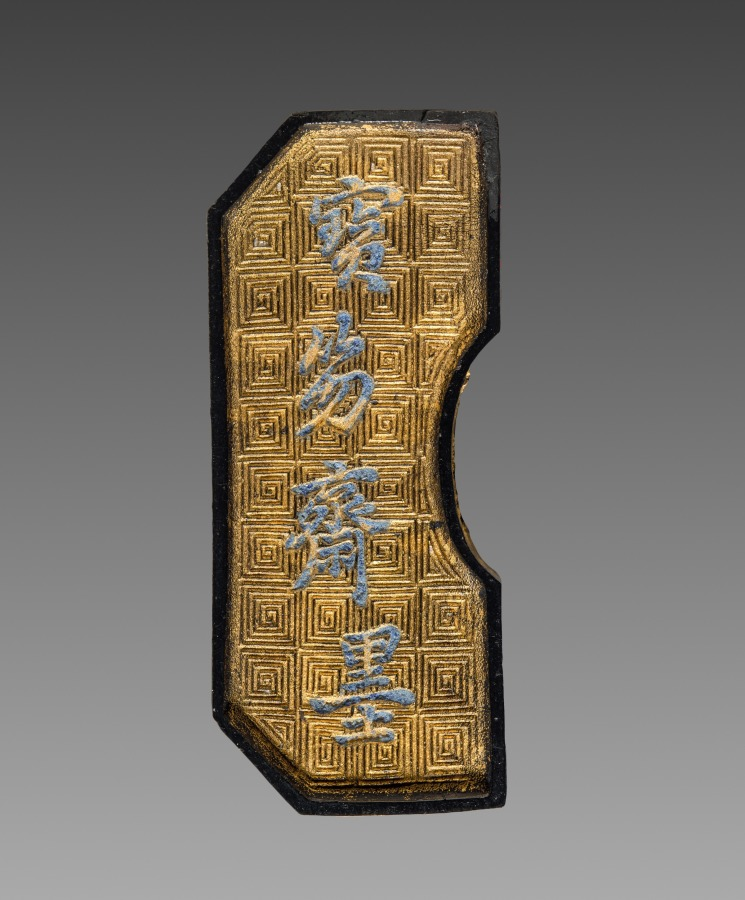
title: Ink Cake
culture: China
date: 1800s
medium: ink cake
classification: Miscellaneous